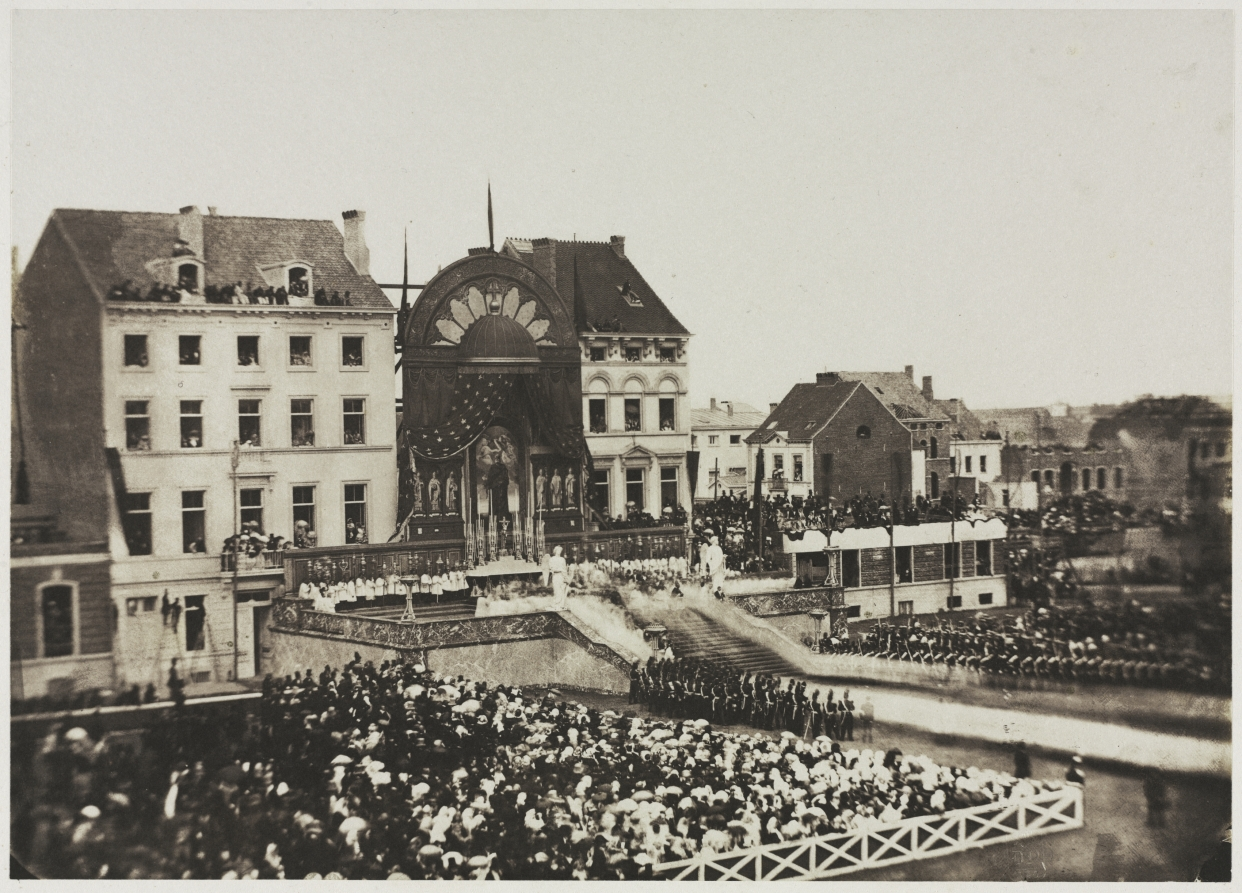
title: Untitled (Ceremony of Thanksgiving)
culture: Belgium, 19th century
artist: Louis Pierre Théophile Dubois de Nehaut (Belgian, 1799–1872)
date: July 1856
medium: salted paper print from wet collodion negative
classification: Photograph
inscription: Written in pencil on mount: "3"